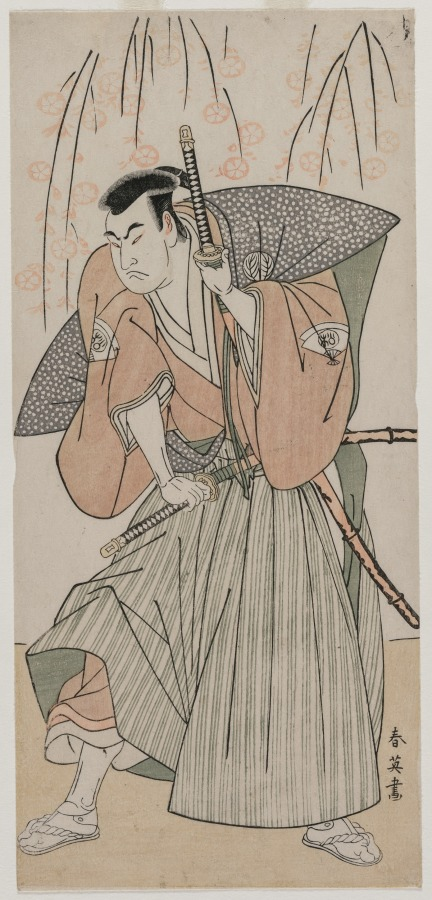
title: Onoe Matsusuke I as a Samurai Standing Beneath a Cherry Tree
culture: Japan, Edo period (1615–1868)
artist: Katsukawa Shunei (Japanese, 1762–1819)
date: late 1780s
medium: color woodblock print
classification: Print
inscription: Signature: Shunei ga